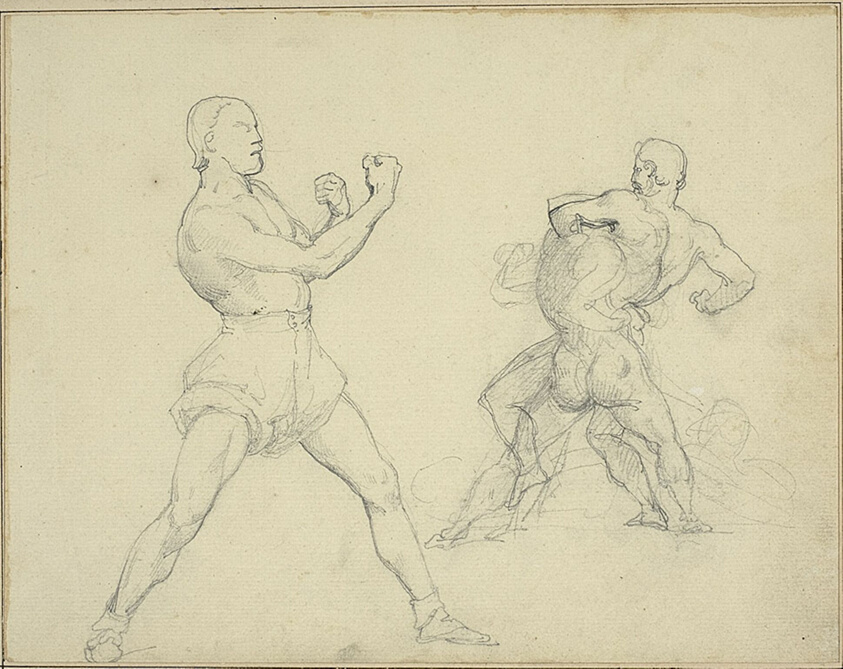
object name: Drawing and Watercolor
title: Boxer Facing Right and Two Men Wrestling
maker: Jean Louis André Théodore Géricault (French, 1791-1824)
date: 1818/1819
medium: Graphite, on cream laid paper, perimeter mounted on cream wove paper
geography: France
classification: graphite; drawings (visual works); prints and drawing